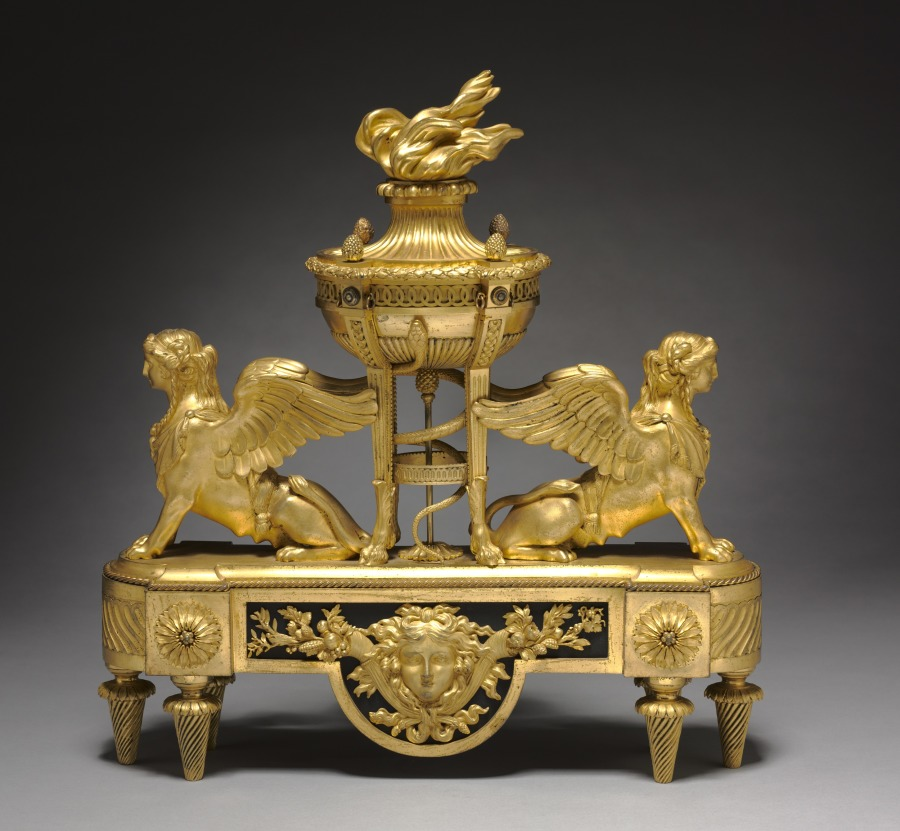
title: Pair of Firedogs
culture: France, 18th century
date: c. 1785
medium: gilt bronze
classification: Furniture and woodwork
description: Although Louis Jean Desprez’s design was largely inspired by tombs in southern Italy, he added sphinxes in his print Tomb with Sphinx due to his fascination with ancient Egypt. Ancient Egyptians saw the sphinx, a half-human, half-lion mythological creature, as a protector of tombs and temples. The pair of andirons, decorative supports for a hearth’s firewood, alongside Tomb with Sphinx, highlight the growing interest in Egyptomania during the 1700s. Interestingly, the andirons portray ancient Greek and Roman interpretations of the sphinx. Most Europeans learned of ancient Egypt by studying Egyptomania in ancient Roman and Greek art and architecture or Egyptian antiquities brought over by the Romans.